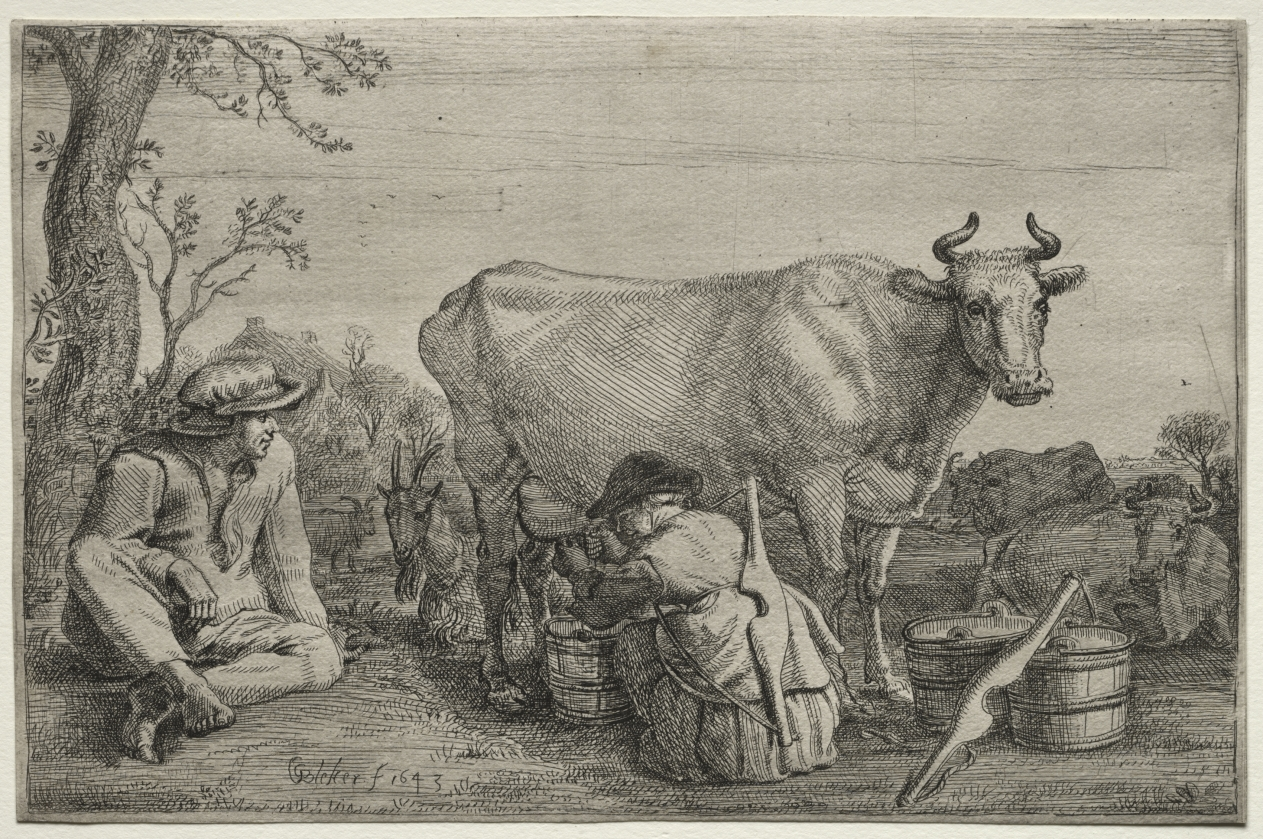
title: The Milkmaid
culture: Netherlands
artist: Gerrit Claesz. Bleker (Dutch, 1656)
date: 1643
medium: etching with surface tone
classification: Print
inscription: lower left, in plate: GBleker f 1643 ; VERSO, lower left, in graphite: Bleker ; lower left, in graphite: 18[4?]a / f10-C M ; lower left, in graphite: 38622/g5 ; lower center, in brown ink: 218 ; lower right, in graphite: B.9. W. 9 I ; lower right, in graphite: [15?]